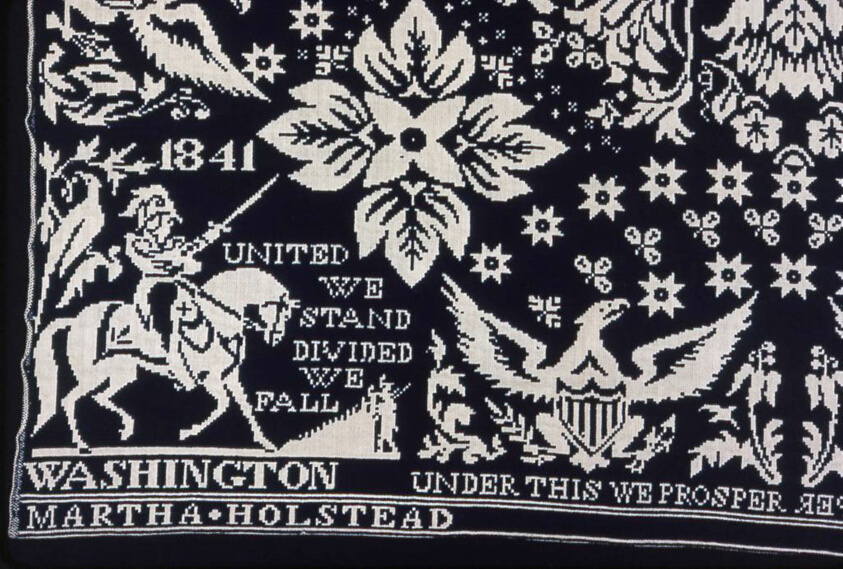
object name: Textile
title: Coverlet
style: 19th century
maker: James Cunningham (American, born Scottish, c. 1797-after 1865); United States, New York, Oneida County, New Hartford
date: 1841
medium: Cotton and wool, plain weave double cloth; woven on loom with Jacquard attachment; two loom widths joined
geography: Oneida County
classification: weaving - coverlet; coverlet; weaving; textile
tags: washington, foliage, prosperity, birds, stars, shields, eagles, wreaths, medallions, flowers, coverlet